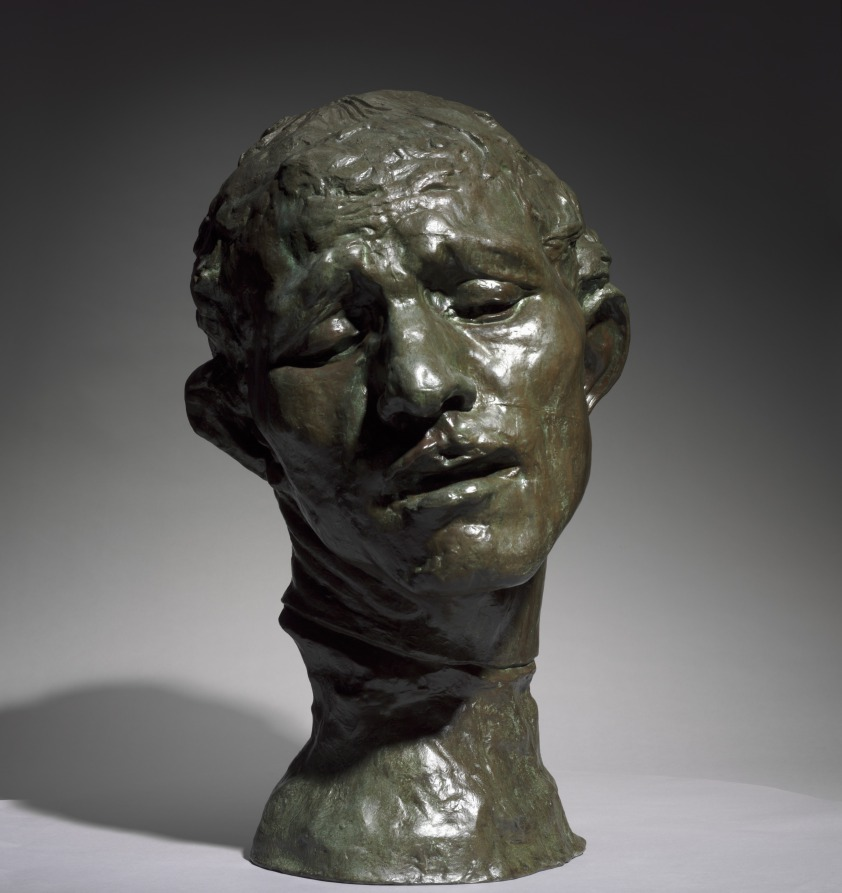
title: Heroic Head of Pierre de Wissant, One of the Burghers of Calais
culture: France, 19th century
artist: Auguste Rodin (French, 1840–1917)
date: 1886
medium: bronze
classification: Sculpture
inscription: inscribed at neck, left: A.Rodin; inscribed lower back: Alexis Rudier/Fondeur-Paris.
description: This sculpture depicts one of the figures in Rodin’s large public monument The Burghers of Calais (1884–89), featuring six French men who volunteered to be taken prisoner by the English in exchange for lifting the siege of Calais during the Hundred Years War (1337–1453). Pierre de Wissant’s anguished expression suggests extreme mental suffering as he contemplates his expected execution. Rodin exhibited a life-size version of the figure as an independent work before completing the monument. He later made multiple versions in various sizes and media.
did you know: This sculpture depicts the head of a figure from Rodin's large public monument The Burghers of Calais (1884-89). The CMA also owns a plaster version of the head.